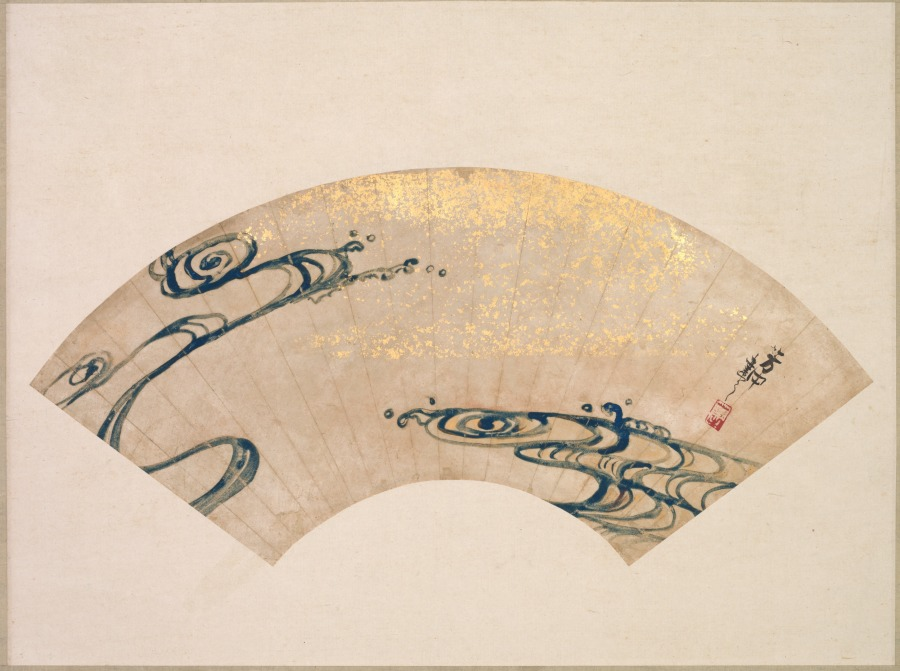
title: Waves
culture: Japan, Edo period (1615–1868)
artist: Nakamura Hōchū (Japanese, d. 1819)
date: late 1700s-early 1800s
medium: fan painting mounted as a hanging scroll; ink and color with gold on paper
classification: Painting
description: Nakamura Hōchū painted waves on this handheld fan to bring coolness to the mind of its bearer. While fragile paper fans are often used for a single season, this one was cherished for its design. Someone carefully removed it from its folding apparatus and converted it into a hanging scroll for occasional enjoyment in an alcove.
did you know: Nakamura Hōchū took inspiration for his work from the painter Ogata Kōrin.